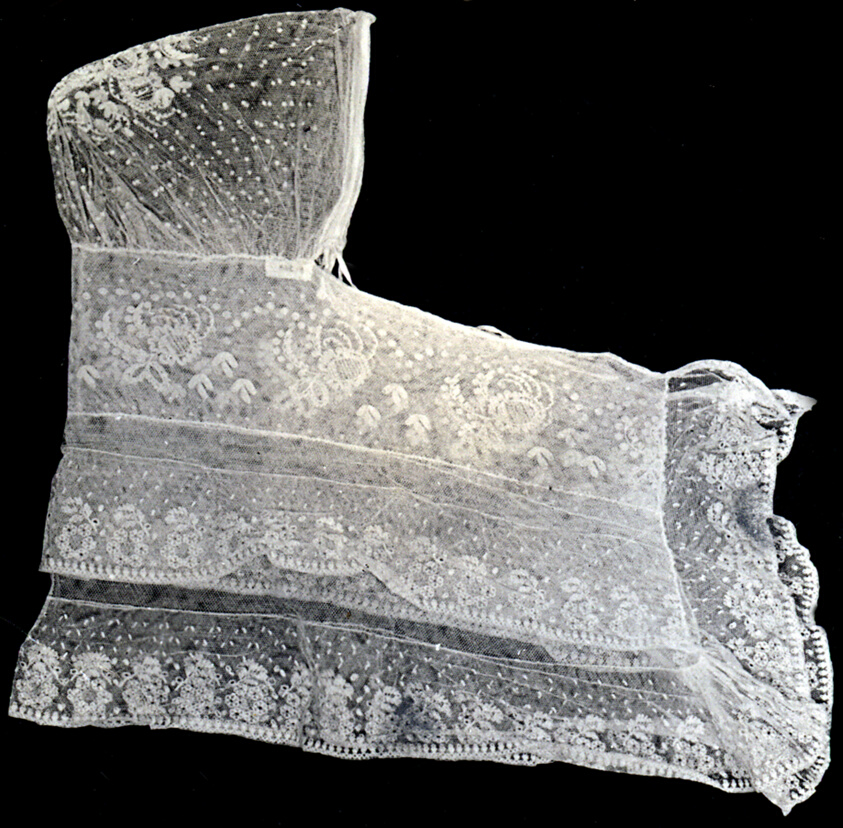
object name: Textile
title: Cap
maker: France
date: 1850/1900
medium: Cotton, machine-made twist net; embroidered with cotton and linen in chain stitches (tambour work), darning, overcast, and wave filling stitches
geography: France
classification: textile; lace - mixed